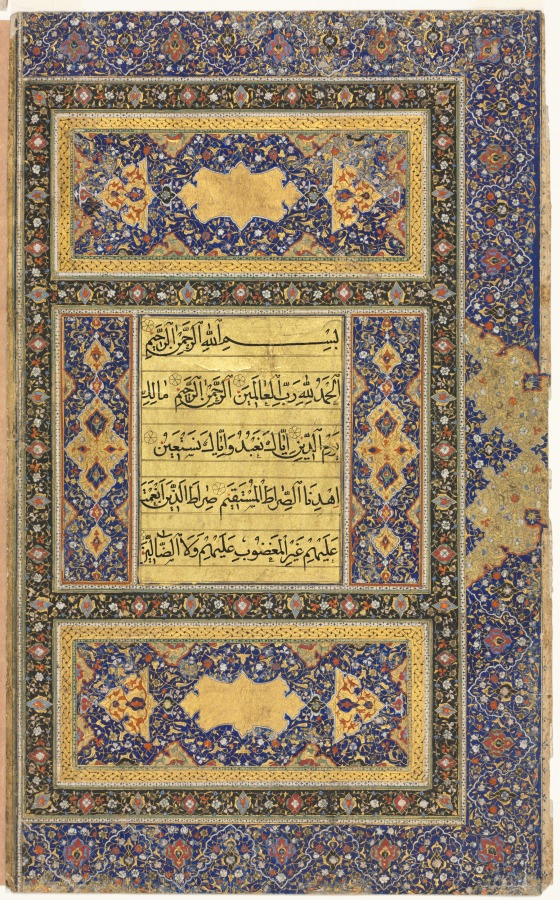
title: Qur'an Manuscript Folio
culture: Afghanistan, Herat, Safavid period (1501–1722)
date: 1500s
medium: ink, gold, and colors on paper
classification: Manuscript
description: Calligraphy, the art of beautiful writing, was elevated above all other art forms in the Islamic world because Allah (God), revealed the divine word of Islam to the Prophet Muhammad (570–632) in the Arabic language. This beautiful double page forms the opening pages, or unwan, of a Qur’an, the sacred book of Islam. Read from right to left, the verses are written in Arabic in elegant naskhi script on a gold ground with florets identifying the ends of the verses. Calligraphers who specialized in beautiful writing often dedicated their lives to copying the Qur’an to grow closer to Allah and receive his blessings. The pages are enhanced with splendid illumination—ornamentation in colors and gold with scrolling vines, blossoms, lozenges, and cartouches within bordered rectangles. Because the book arts were held in high esteem in the Islamic world, decorative motifs created by illuminators were often adopted in other art forms such as metalwork, textiles, and carpets.